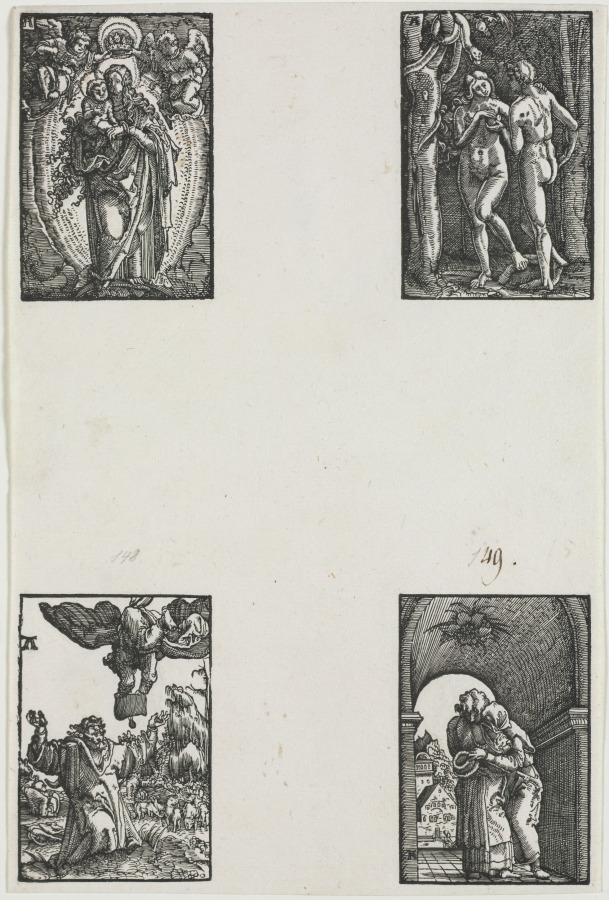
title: The Fall and Redemption of Man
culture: Germany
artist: Albrecht Altdorfer (German, c. 1480–1538)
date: c. 1513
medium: woodcut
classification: Print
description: These eight woodcuts come from a series of forty which illustrate the story of Christian redemption from original sin to the Last Judgement. Probably to maximize printing efficiency and quality, eight woodblocks were printed on each of five sheets of paper, but the subjects are not in the correct chronological order. Prior to sale, the sheets were cut into eight pieces. The sheets in the museum's set were only cut in half, preserving four prints per page. The numbers after the titles of the individual images indicate each scene's place within the narrative. By 1513, Altdorfer had already executed a number of small, finely detailed engravings. Because it is difficult to achieve the same degree of precision using woodcut, The Fall and Redemption of Man is a technical tour de force. Probably inspired by Albrecht Dürer's Small Passion (1511)-but almost double the size-the only contemporaneous comparable set of fine miniature woodcuts, Dance of Death, was designed by Hans Holbein in about 1526 (on view nearby).